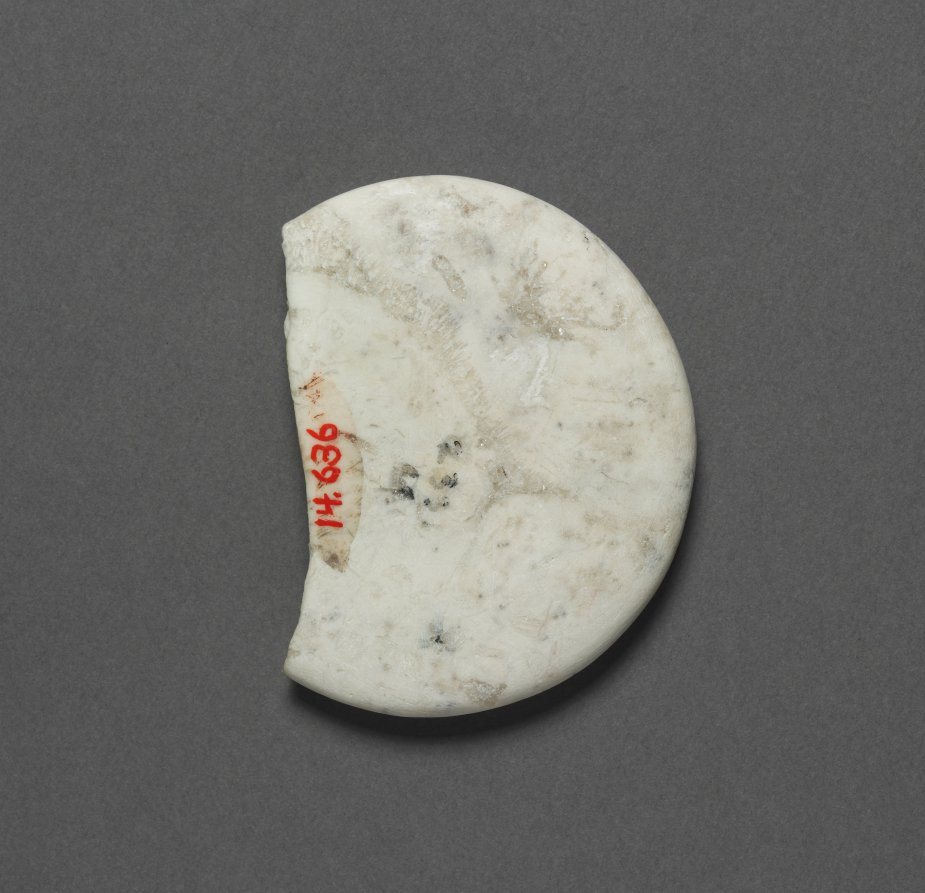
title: Cosmetic Vessel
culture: Egypt, Saqqara, north of the Step Pyramid, tomb 2331, excavations of J. E. Quibell, 1910-1911, Predynastic, Dynasty 2-3, 2770-2573 BC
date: 2770–2573 BCE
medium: limestone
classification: Vessels